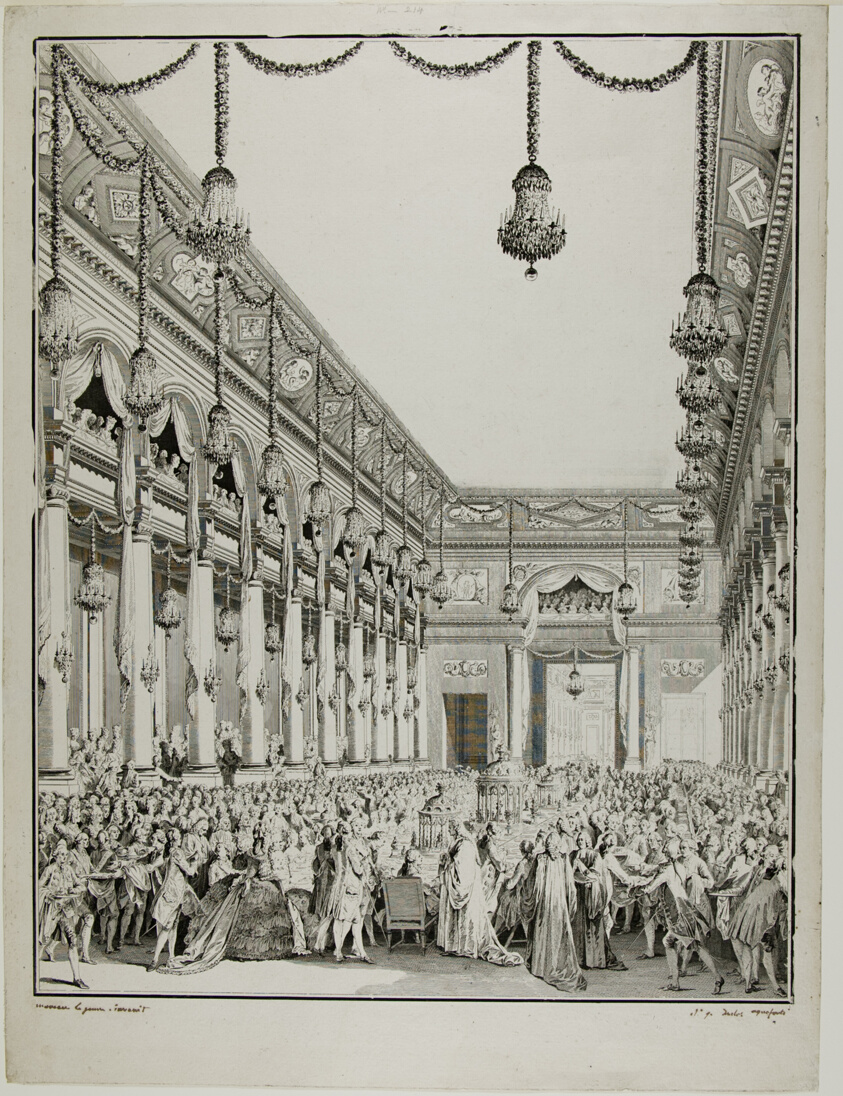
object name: Print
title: Royal Feast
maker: Jean Michel Moreau (French, 1741-1814); partially etched and finished by Antoine Jean Duclos (French, 1742-1795)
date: 1782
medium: Etching and engraving on ivory laid paper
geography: France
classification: etching; print; prints and drawing